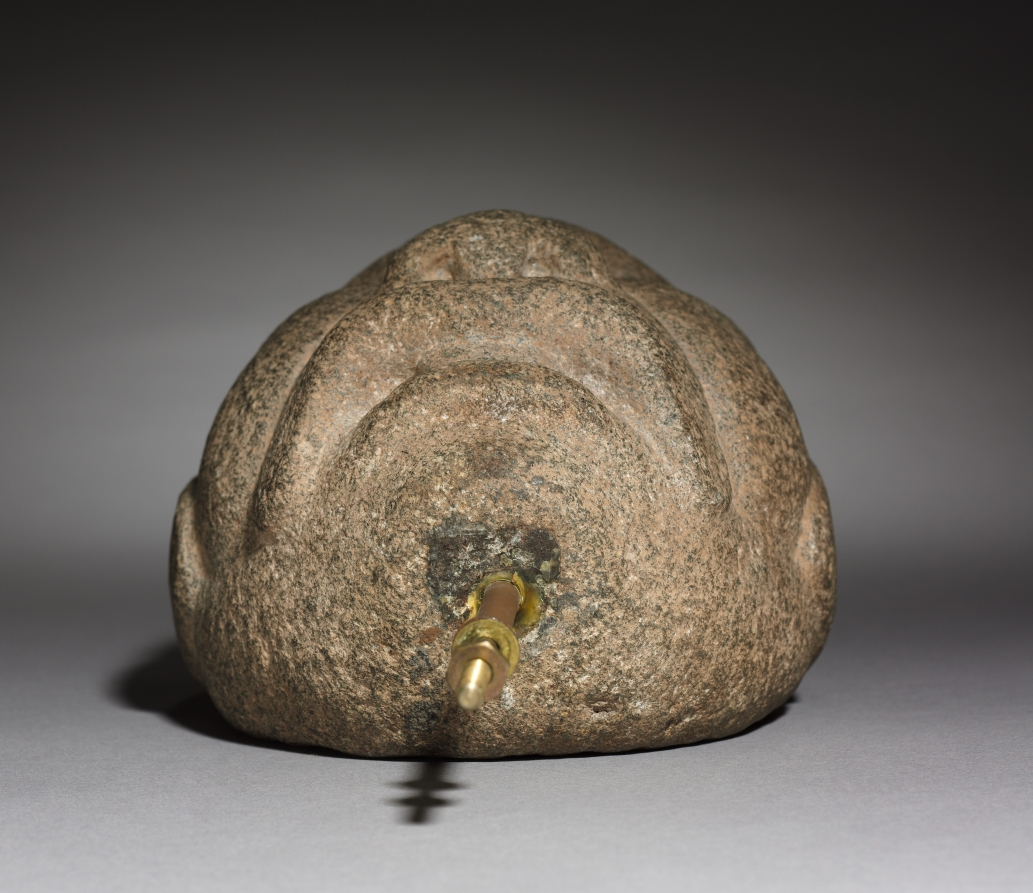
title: Head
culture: Mesoamerica, Mexico, Olmec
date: 1200–300 BCE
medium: stone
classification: Sculpture